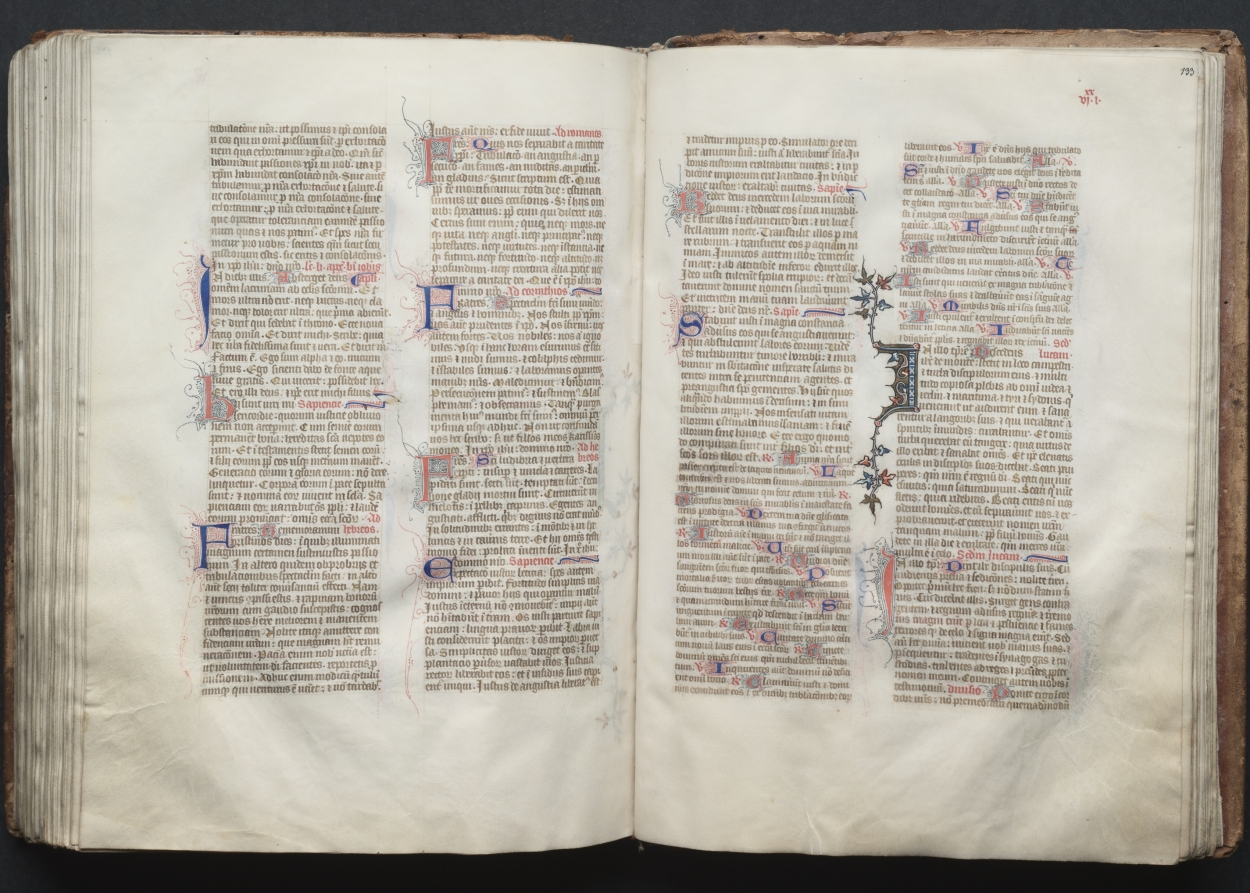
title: The Gotha Missal: Fol. 133r, Text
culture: France, Paris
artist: Master of the Boqueteaux (French)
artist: and Workshop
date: c. 1375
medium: ink, tempera, and gold on vellum; blind-tooled leather binding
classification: Bound Volume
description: The style and quality of this manuscript's decoration is typical of deluxe Parisian books made for aristocratic or royal patrons. Most of the book's decoration appears to be the work of the Master of the Boqueteaux, an artist active at the court of King Charles V (died 1380). His style was apparently shared by a number of book illuminators working in and around Paris. It is very possible that the Gotha Missal belonged to Charles V, but is not provable because the manuscript has no royal portraits and lacks a colophon. Given the book's magnificent decoration, however, it would seem that it was produced for a Valois prince, if not for the king himself. The manuscript receives its name from the German dukes of Gotha, its later owners.